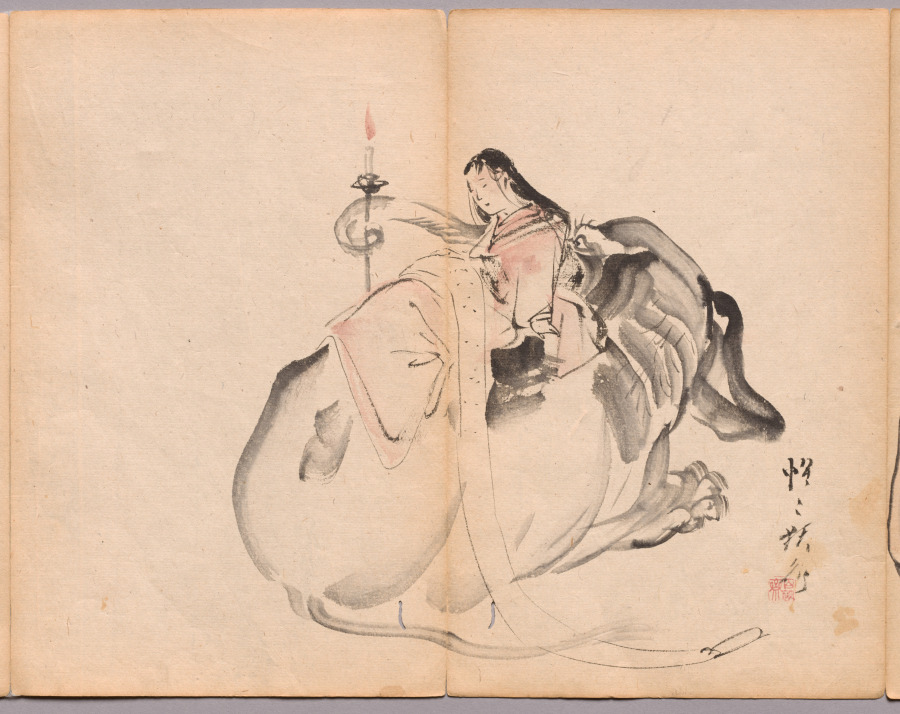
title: Stand-in Monju from Sketch Album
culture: Japan, Edo period (1615–1868) to Meiji period (1868–1912)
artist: Kawanabe Kyōsai (Japanese, 1831–1889)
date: mid- to late 1800s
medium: Accordion-style book of 26 double-leaves; ink and color on paper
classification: Bound Volume